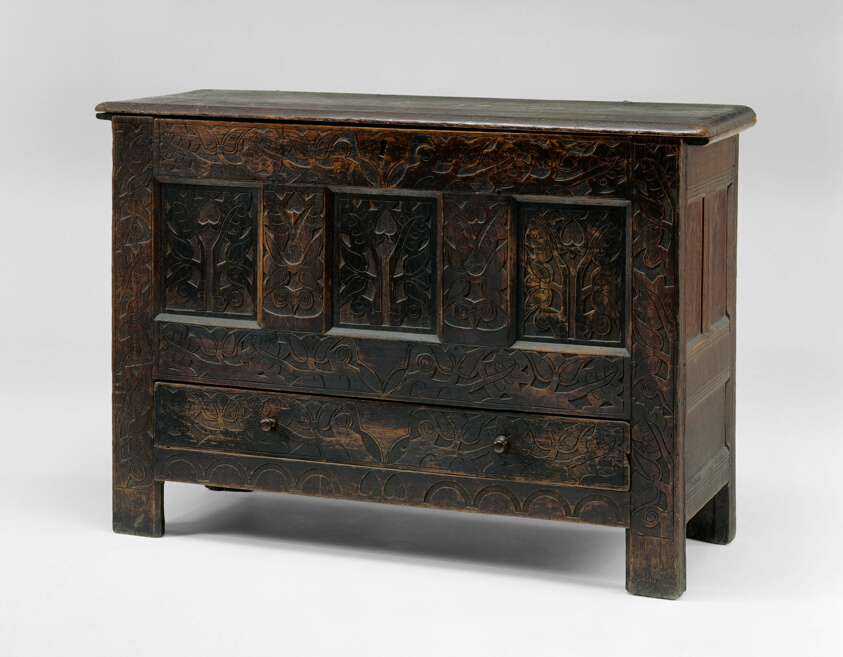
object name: Furniture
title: Chest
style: Folk Art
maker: Artist unknown (American, 18th century); Hampshire, Massachusetts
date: c. 1710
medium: Oak with white pine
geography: Hatfield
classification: case furniture; furniture; american decorative arts; american arts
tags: furniture